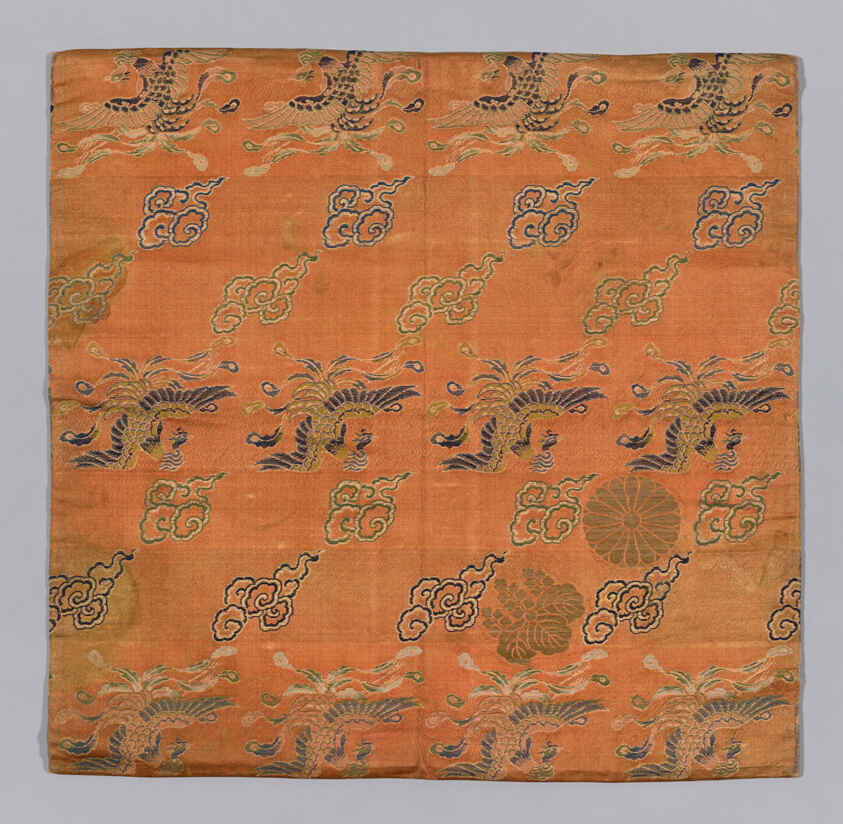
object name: Religious/Ritual Object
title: Uchishiki (Altar Cloth)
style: Japanism, edo (japanese period)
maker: Japan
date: Edo period (1615–1868), 1750/1800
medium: Silk and gold-leaf-over lacquered-paper strip, warp-float faced 4:1 ‘Z’ twill weave with weft-float faced 1:2 ‘Z’ twill interlacings of secondary binding warps and supplementary patterning wefts; lining: cotton, plain weave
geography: Japan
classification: textile; liturgical - buddhist; weaving; ritual objects